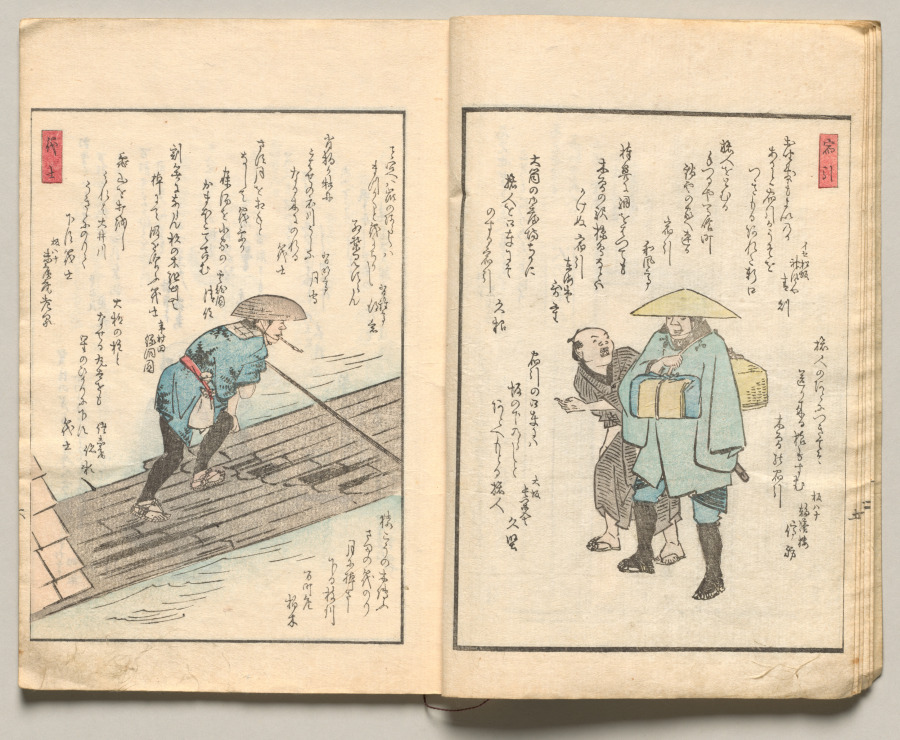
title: Spread Six from Volume Five of People of Japan in Light Verse (Kyōka)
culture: Japan, Edo period (1615–1868)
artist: Utagawa Hiroshige (Japanese, 1797–1858)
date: 1857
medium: Woodblock-printed book; ink and color on paper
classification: Bound Volume